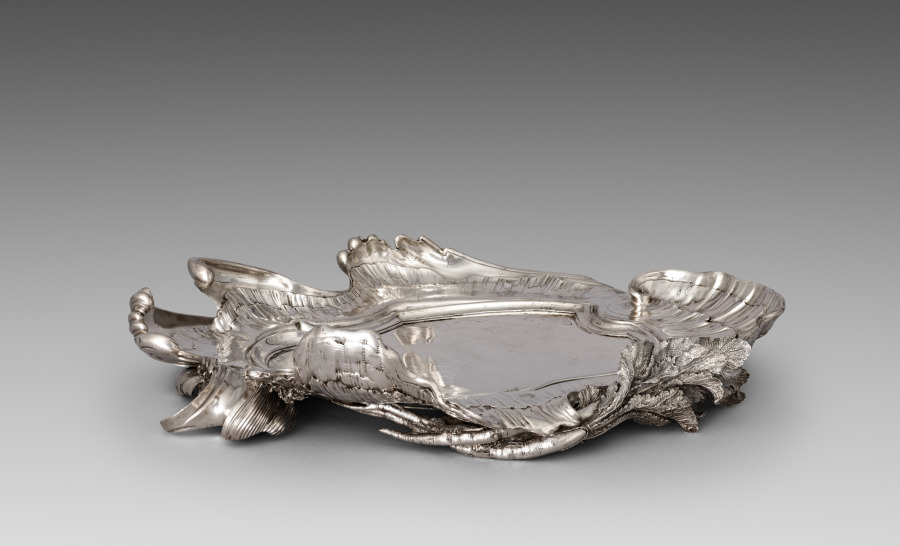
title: Stand for a Covered Tureen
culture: France, Paris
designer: Juste-Aurèle Meissonnier (French, 1695–1750)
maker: Pierre-François Bonnestrenne (French)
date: 1735–38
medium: silver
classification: Silver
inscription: engraved Meissonnier signature.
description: See entry for cover record 1977.182.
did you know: The langoustine, pigeon, and vegetables were cast using real examples giving the silver copies lifelike detail and appearance.